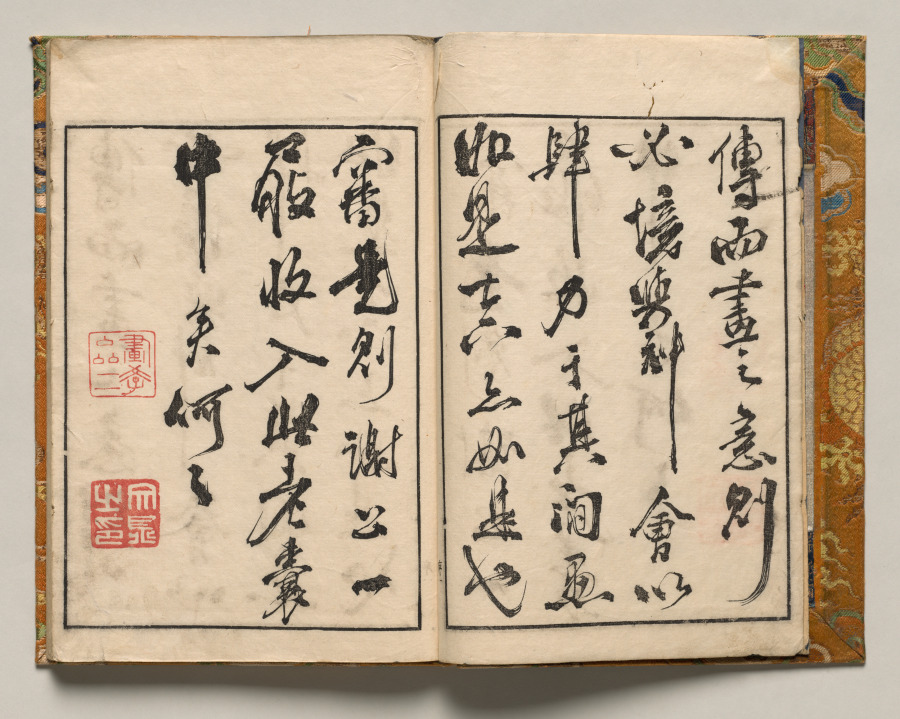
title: Preface continued from Shazanrō Picture Book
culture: Japan, Edo period (1615–1868)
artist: Tani Bunchō (Japanese, 1763–1841)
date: 1816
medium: woodblock-printed book; ink and color on paper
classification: Bound Volume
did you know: Shazanrō was one of Tani Bunchō's style names.